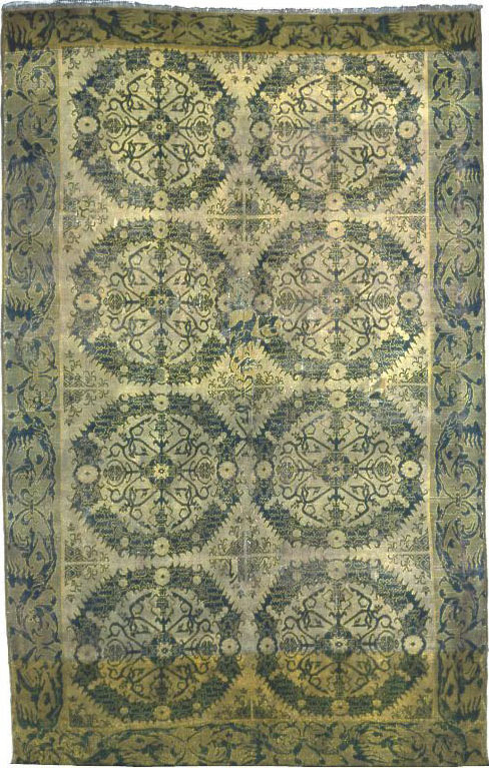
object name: Textile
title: Carpet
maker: Spain, Alcaraz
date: 1575/1600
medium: Wool, plain weave with supplementary wrapping wefts forming cut pile through a technique known as "Sapnish knots"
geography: Spain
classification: textile; weaving - carpet